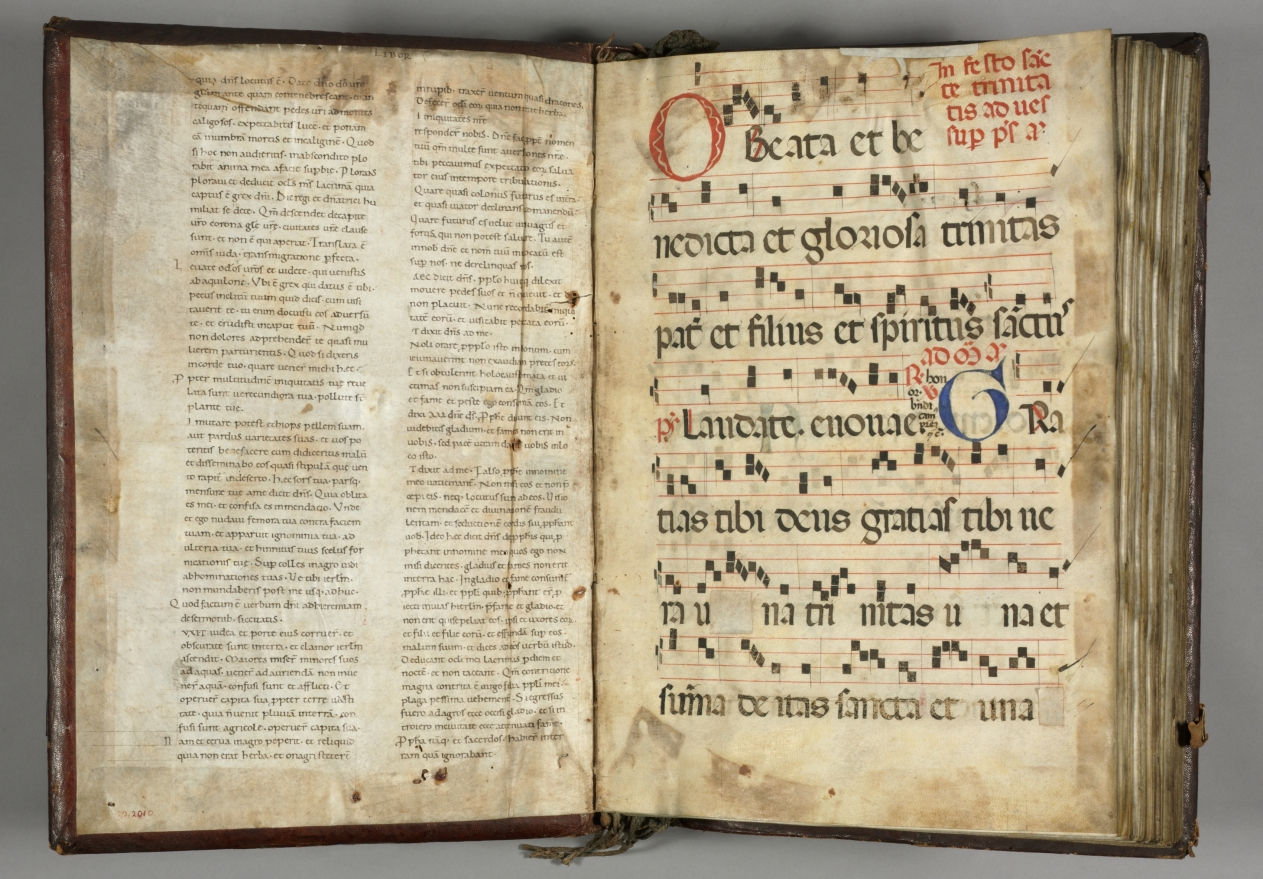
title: Choir Book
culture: Italy, 16th century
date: 1500s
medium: leather binding, copper alloy buckles, lead seal, parchment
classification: Manuscript